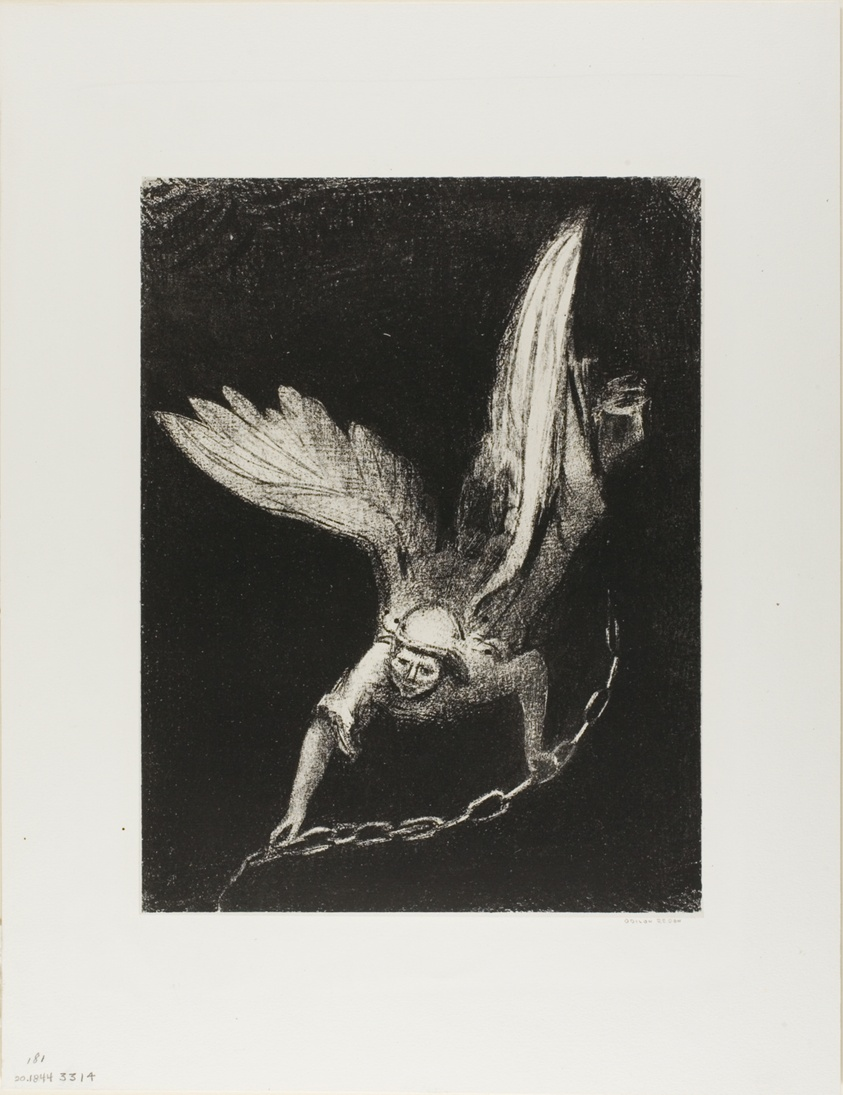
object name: Print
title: And I Saw an Angel Come Down from Heaven, Having the Key of the Bottomless Pit and a Great Chain in His Hand, plate 8 of 12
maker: Odilon Redon (French, 1840-1916)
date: 1899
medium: Lithograph in black on cream China paper laid down on ivory wove paper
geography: France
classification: lithograph; print; prints and drawing; paper